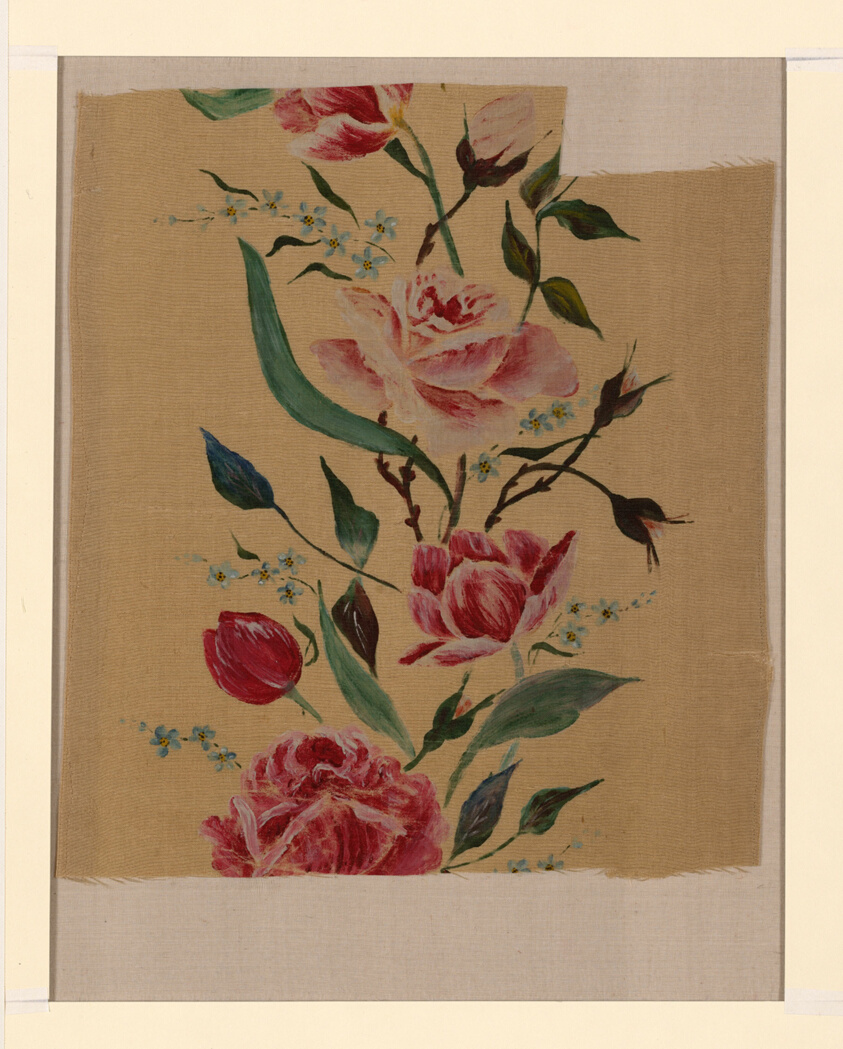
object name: Textile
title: Fragment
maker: France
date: 19th century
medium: Silk, warp-faced, weft-rib plain weave; painted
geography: France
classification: textile; weaving - printed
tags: flowers, foliage